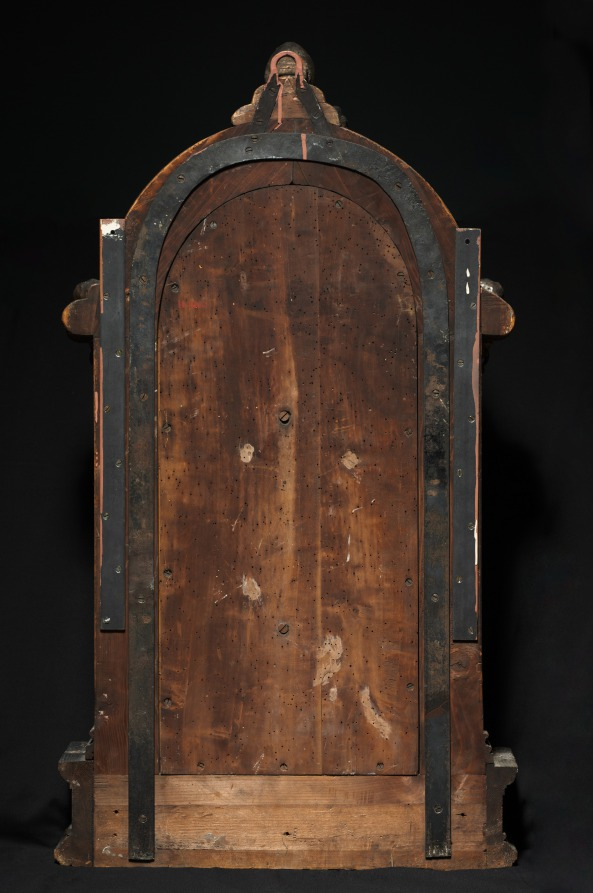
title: Virgin and Child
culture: Italy, late 15th-early 16th Century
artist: Benedetto Buglioni (Italian, 1461–1521)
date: 1500–1510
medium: glazed terracotta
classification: Sculpture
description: This small devotional object differs stylistically from Buglioni's Madonna and Child Enthroned with Saints Francis and Anthony Abbot (1921.1180), also in the museum's collection. In contrast to the other work, the faces of the Madonna and Child are significantly less expressive, and the passages of exposed skin have been left unglazed. The Madonna holds a nude Christ on her left arm and wears a mantle of blue with green lining and a maroon tunic with a yellow collar and cuffs. Her bright yellow shoes and the purple of her tunic are characteristic of Buglioni's color scheme and can also be seen in the other work. The tabernacle frame is probably contemporary to the figures, although it may not have been created specifically for this altarpiece. Buglioni likely worked in the studio of Andrea della Robbia, where he would have studied the family's techniques for glazing terracotta. The frame is classically inspired, with Corinthian capitals and Buglioni's characteristic egg and dart moldings. The facial type in this Madonna and Child recalls Buglioni's Madonna delle Grazie in Florence's Palazzo Frescobaldi, and because of this similarity, the scholar Allan Marquand attributed the Cleveland Madonna and Child to Buglioni in 1921, although this attribution has since been questioned.